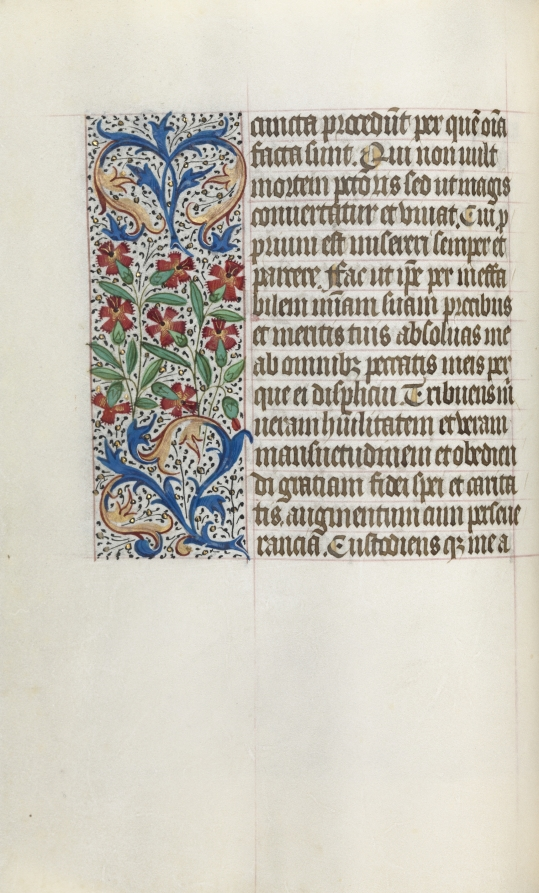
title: Book of Hours (Use of Rouen): fol. 24v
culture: France, Rouen, 15th century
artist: Master of the Geneva Latini (French, active Rouen, 1460–80)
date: c. 1470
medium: ink, tempera, and gold on vellum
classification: Bound Volume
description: In the late 1400s and early 1500s Rouen was an established and important center of book production. The city’s cathedral had a wealthy chapter that spent large sums of money to commission books and to maintain its extensive library. The stationers and booksellers would have likely been concentrated in or near the cathedral precinct. This artist, named after a manuscript now in Geneva, was Rouen’s principal illuminator during the second half of the 1400s.